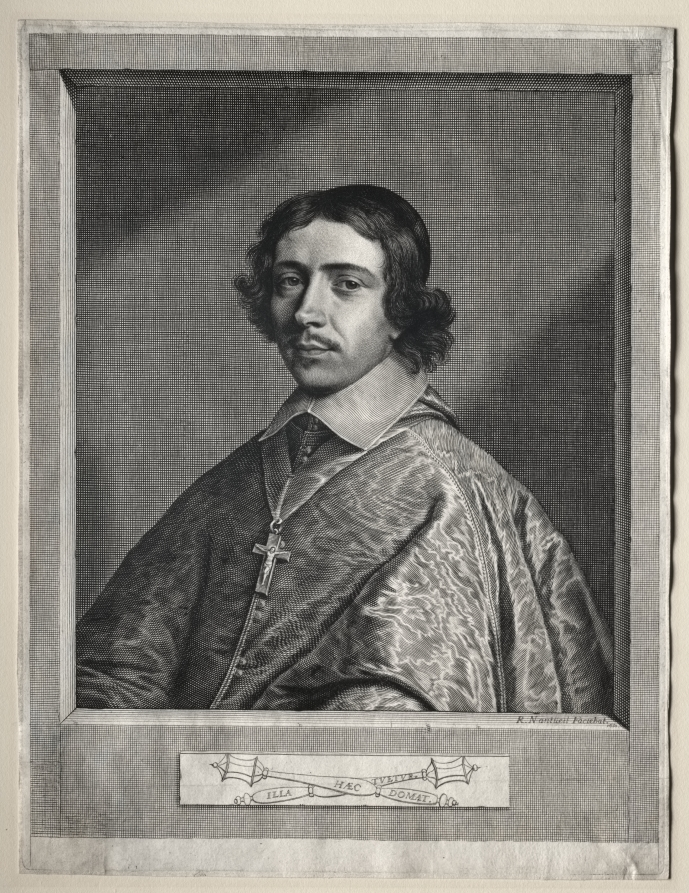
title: Cardinal de Retz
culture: France, 17th century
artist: Robert Nanteuil (French, 1623–1678)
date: 1650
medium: engraving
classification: Print